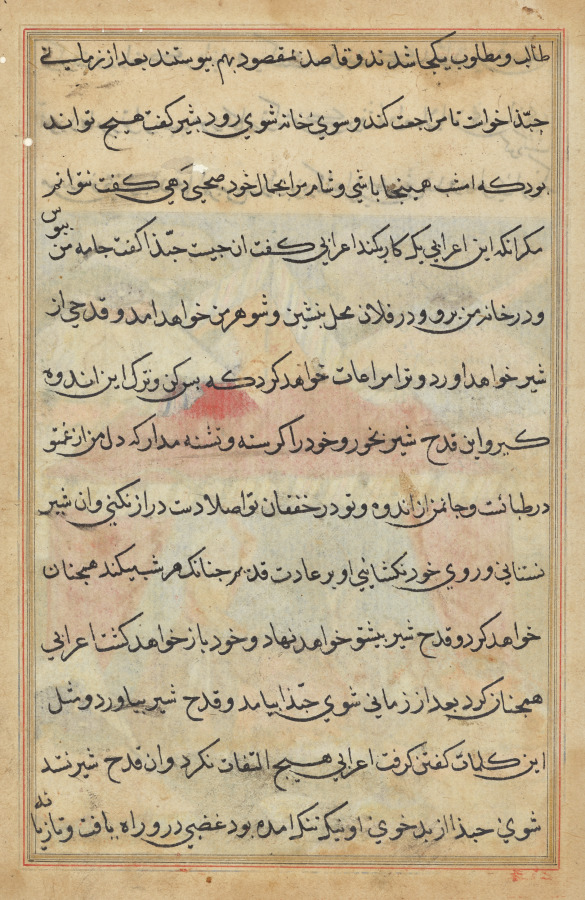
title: Page from Tales of a Parrot (Tuti-nama): text page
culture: Mughal India, court of Akbar (reigned 1556–1605)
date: c. 1560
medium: gum tempera, ink, and gold on paper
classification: Painting